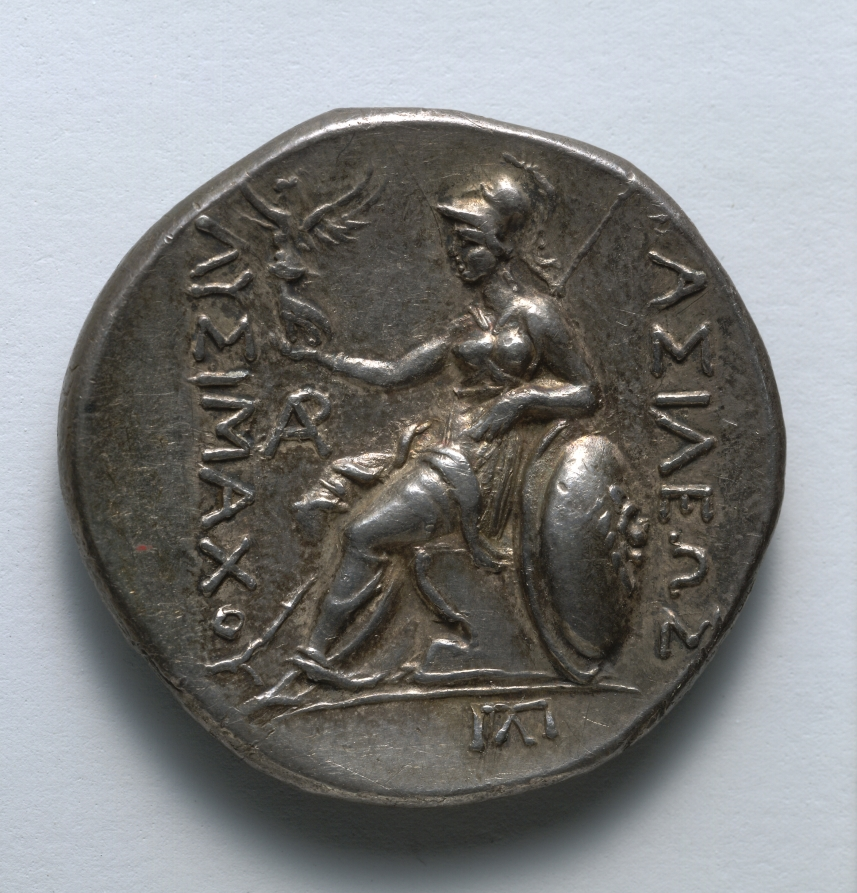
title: Tetradrachm: Athena (reverse)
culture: Greek, Macedonian, minted at Lysimachia (Thrake), reign of Lysimachos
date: 297–281 BCE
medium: silver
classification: Coins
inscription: ΒΑΣΙΛΕΩΣ | ΛΥΣΙΜΑΧΟΥ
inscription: ΑΡ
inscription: Λ within Π